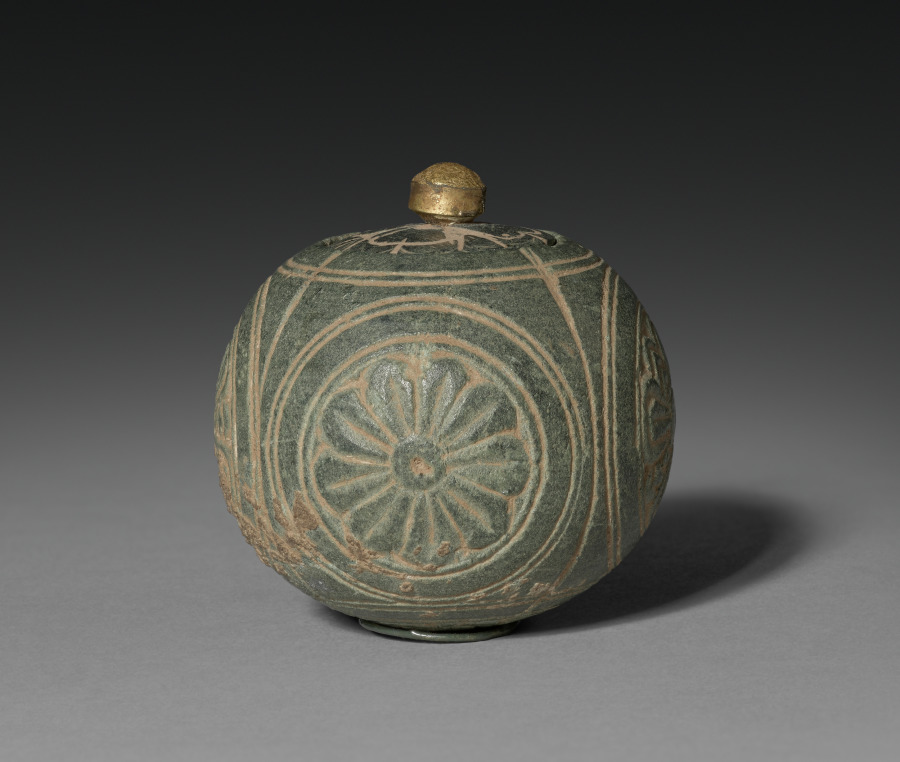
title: Miniature Stone Reliquary or Toilette Casket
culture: Pakistan, Gandhara, probably Sirkap, early Kushan period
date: 1–100 CE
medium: gray schist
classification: Sculpture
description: Tiny reliquaries holding the cremated remains of the Buddha or a high-ranking holy person empowered monuments and made them sacred. A Buddhist monument, such as the solid hemispherical mounds called stupas, would not be worshipped until it was consecrated with the relic secreted inside. Bits of ash were combined with tiny gems inside a crystal or glass reliquary, which was then placed inside a stone or metal container, like the lidded versions seen here. These containers look like cosmetic vessels for aromatic pastes used for perfume in ancient India. Buddhist texts state that the enlightened Buddha emitted a fragrance like sandalwood paste; the form of the reliquary as a perfume bottle indicates the presence of the Buddha by the visual reference to his pleasant scent. Once enclosed in the stupa the reliquaries would not be seen, but monks were tasked with applying sandalwood paste to the exterior of stupas as part of their regular maintenance to convey to visitors the ongoing presence of the Buddha radiating from the relic in the center.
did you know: The knob of the lid is gilded, as is the interior of the casket.